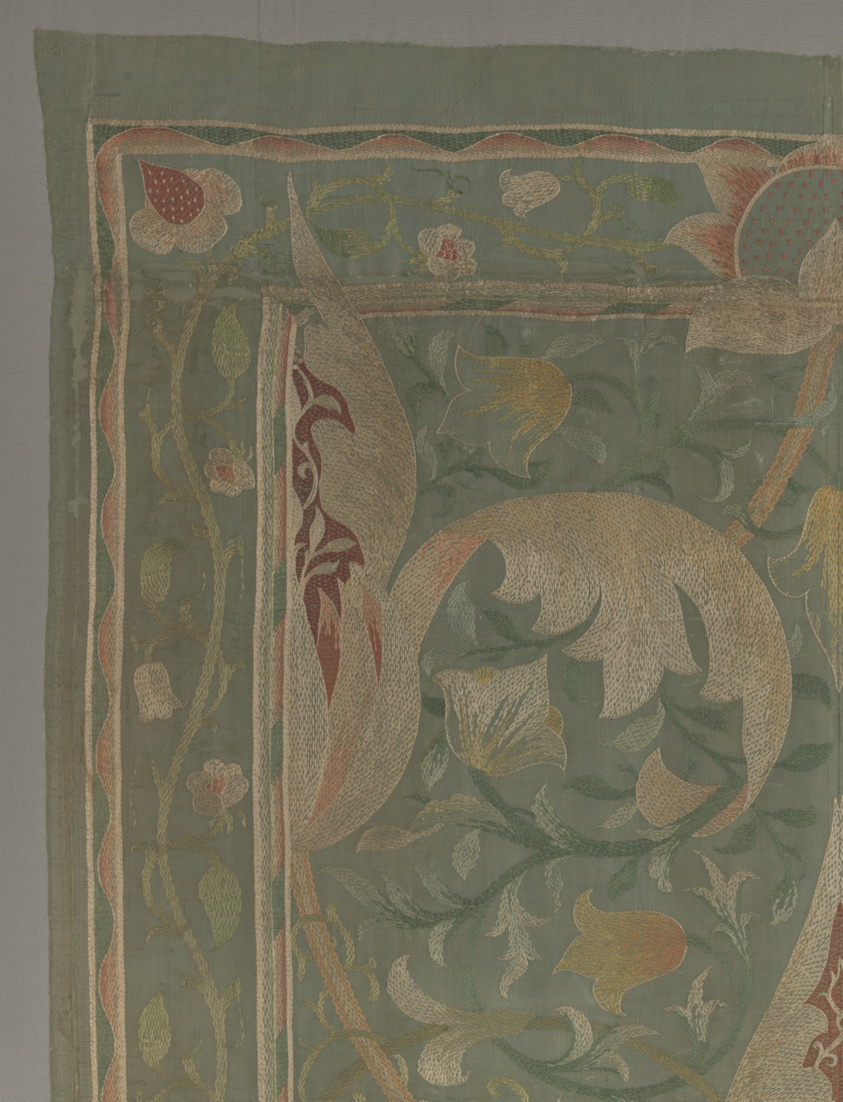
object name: Textile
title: Lotus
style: Arts and Crafts Movement, british, 19th century, British Arts and Crafts Movement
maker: Design attributed to May Morris (English, 1862–1938); Produced by Morris & Co., London (English, 1875–1940); Embroidered by the Decorative Arts Society, Chicago (American, founded 1877)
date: Design by 1888, made 1888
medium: Silk, warp-float faced twill weave; embroidered in satin and stem stitches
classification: textile; needlework (visual works)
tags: floral, lotus